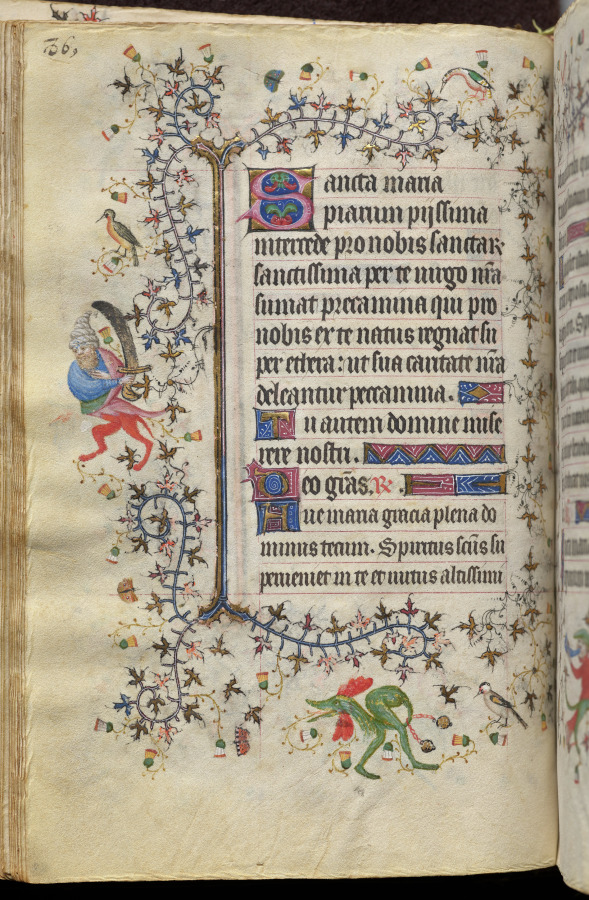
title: Hours of Charles the Noble, King of Navarre (1361-1425): fol. 43v, Text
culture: France, Paris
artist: Master of the Brussels Initials and Associates (French)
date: c. 1405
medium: ink, tempera, and gold on vellum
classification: Bound Volume